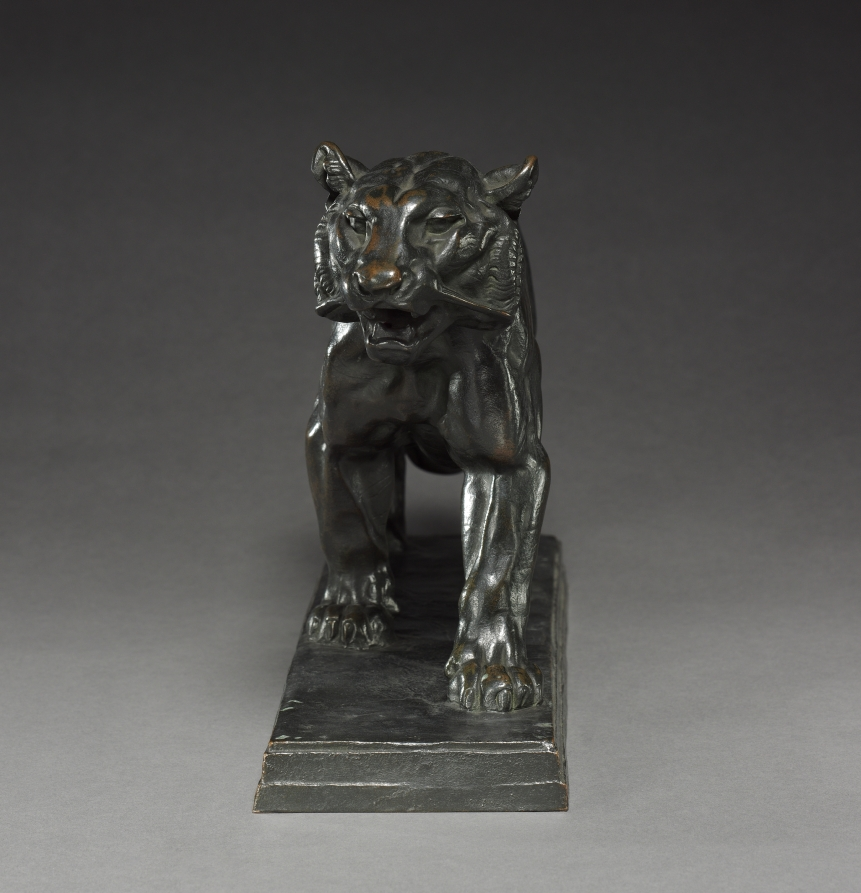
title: Walking Tiger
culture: France, 19th century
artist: Antoine-Louis Barye (French, 1796–1875)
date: c. 1836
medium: bronze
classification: Sculpture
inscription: Signed on base: "Barye"